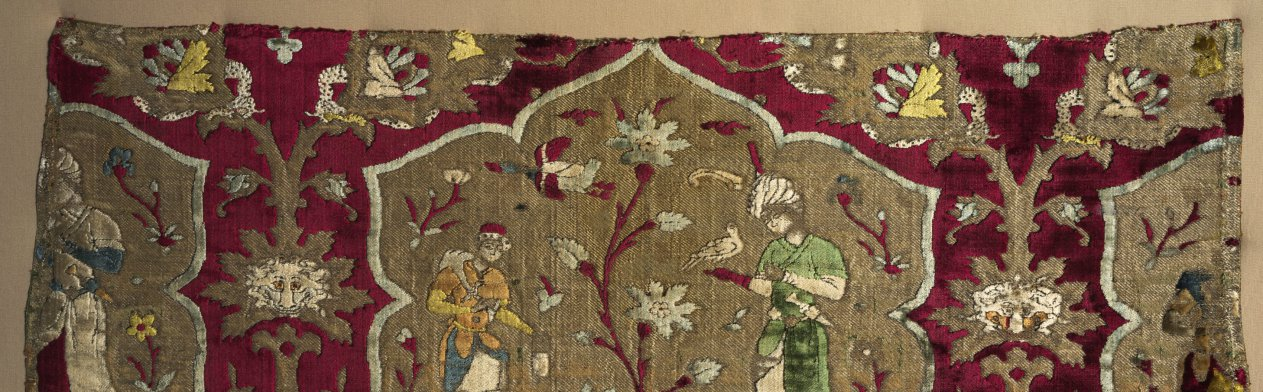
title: Fragment with falconer and attendant in animated lattice, from a robe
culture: Iran, Kashan, Safavid period (1501–1722)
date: mid-1500s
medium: Silk: velvet, brocaded, pile-warp substitution; gilt-metal thread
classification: Velvet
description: This velvet of Iran’s Safavid period (1501–1722) displaying a falconry scene is celebrated for its refined beauty and meticulous draftsmanship. A falconer and attendant flank a blossoming plant on a golden ground of lobed medallions. Animated vines display leaves bearing lion’s masks and dragons coiled around larger leaves on the crimson ground. Instead of two or three colors of velvet, Iranian weavers wove with as many as 14 colors, the most colorful velvets ever woven.